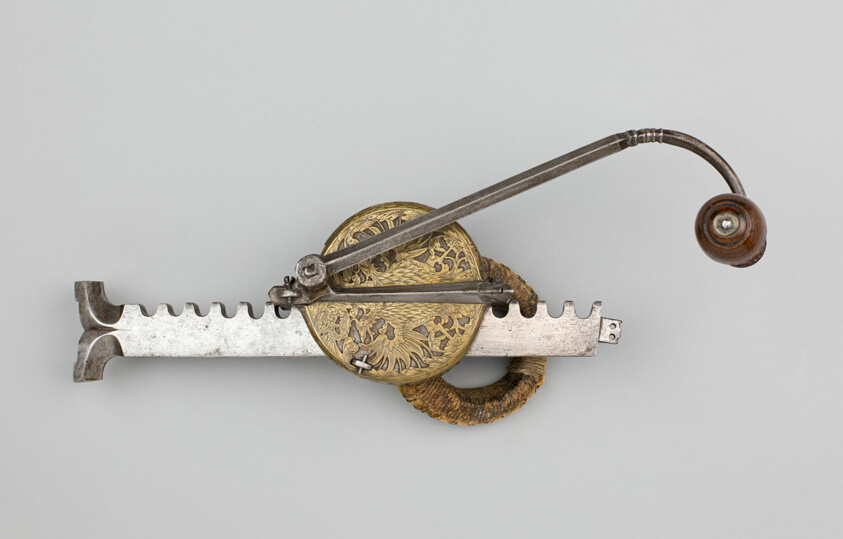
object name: Arms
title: Cranequin (Winder) for a Crossbow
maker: German, Nuremberg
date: 1570/80 with a mid–17th century decoration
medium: Steel, iron with gilding, wood, and cord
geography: Nuremberg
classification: crossbow; arms; arms and armor